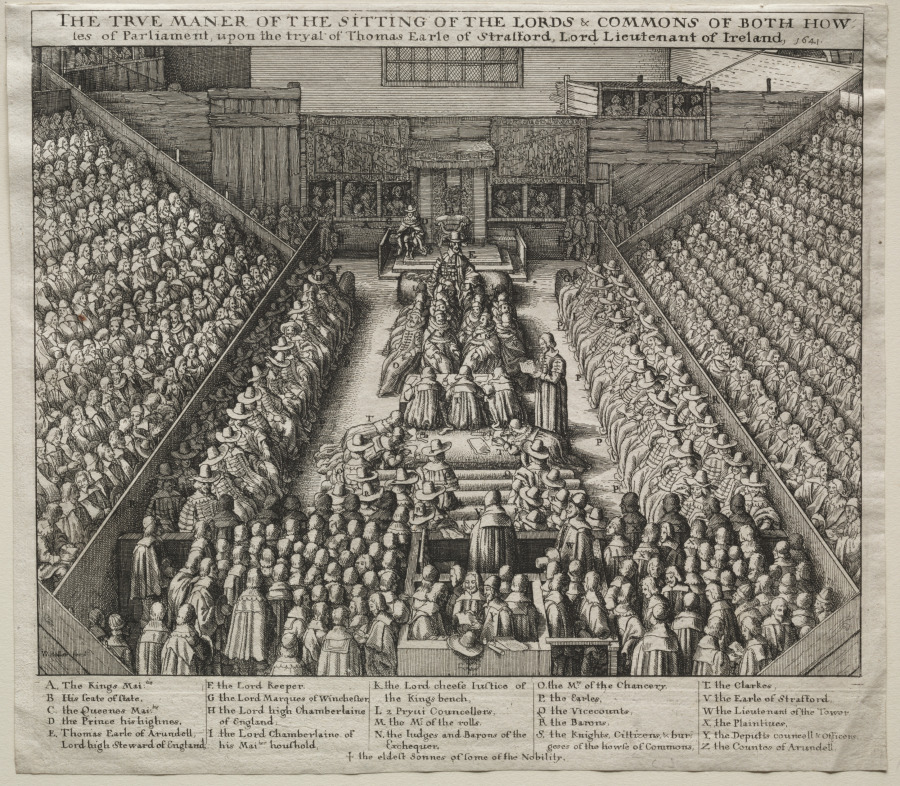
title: Westminster Hall, Interior, with The Trial of the Earl of Strafford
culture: Bohemia, 17th century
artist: Wenceslaus Hollar (Bohemian, 1607–1677)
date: 1641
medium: etching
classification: Print